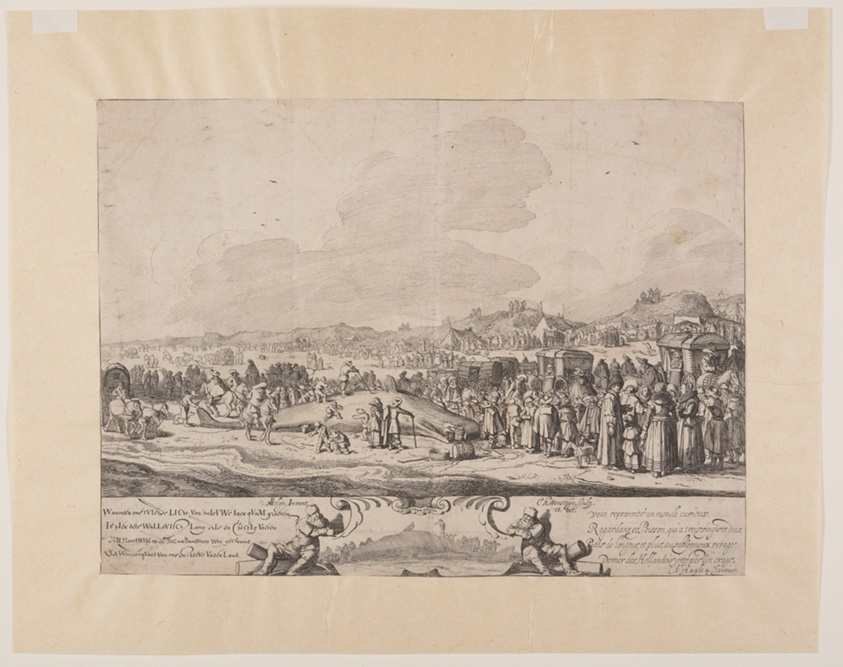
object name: Print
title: The Cachalot Stranded between Noordwijk and Zandvoort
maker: Cornelis van Kittensteyn (Dutch, c. 1598–c. 1652); after Pieter Molijn (Dutch, 1595-1661)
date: c. 1629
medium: Engraving on ivory laid paper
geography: Netherlands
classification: print; paper; prints and drawing; engraving